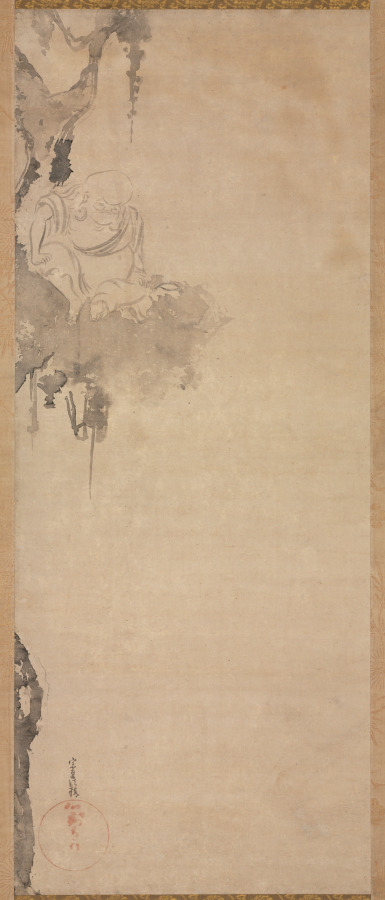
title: The Bird's Nest Patriarch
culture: Japan, Edo period (1615–1868)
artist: Tawaraya Sōtatsu (Japanese, c. 1570–c. 1640)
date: early to mid-1600s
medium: hanging scroll; ink on paper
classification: Painting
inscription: signed at the lower left of the scroll and sealed "Inen" in red circular form.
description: Tawaraya Sōtatsu’s painting was inspired by a 1602 Chinese book that featured images of legendary Chinese Buddhist experts and Daoist sages. The monk portrayed here is Niaoge, which literally means “Bird’s Nest.” He was a Zen practitioner who favored the isolation of treetops, from which he offered advice to the perplexed. The posture of the single figure suggests a dialogue with someone below. Sōtatsu was a master of the “boneless” (mokkotsu), or un-outlined, style of ink painting that relies on layered pools of ink wash for effect.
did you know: This painting is based on the 1602 illustrated publication Marvelous Traces of Immortals and Buddhas (Chinese: Xianfo qizong).